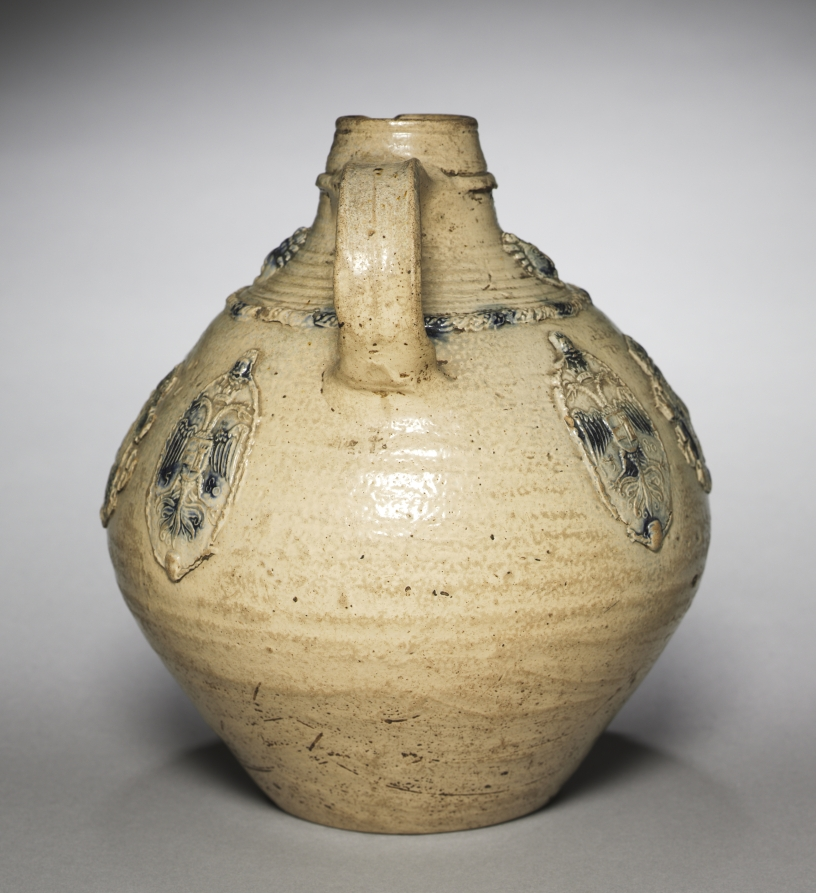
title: Jug with the Arms of Cleves-Berg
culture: Germany, Siegburg, 16th century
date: 1580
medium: salt-glazed stoneware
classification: Ceramic